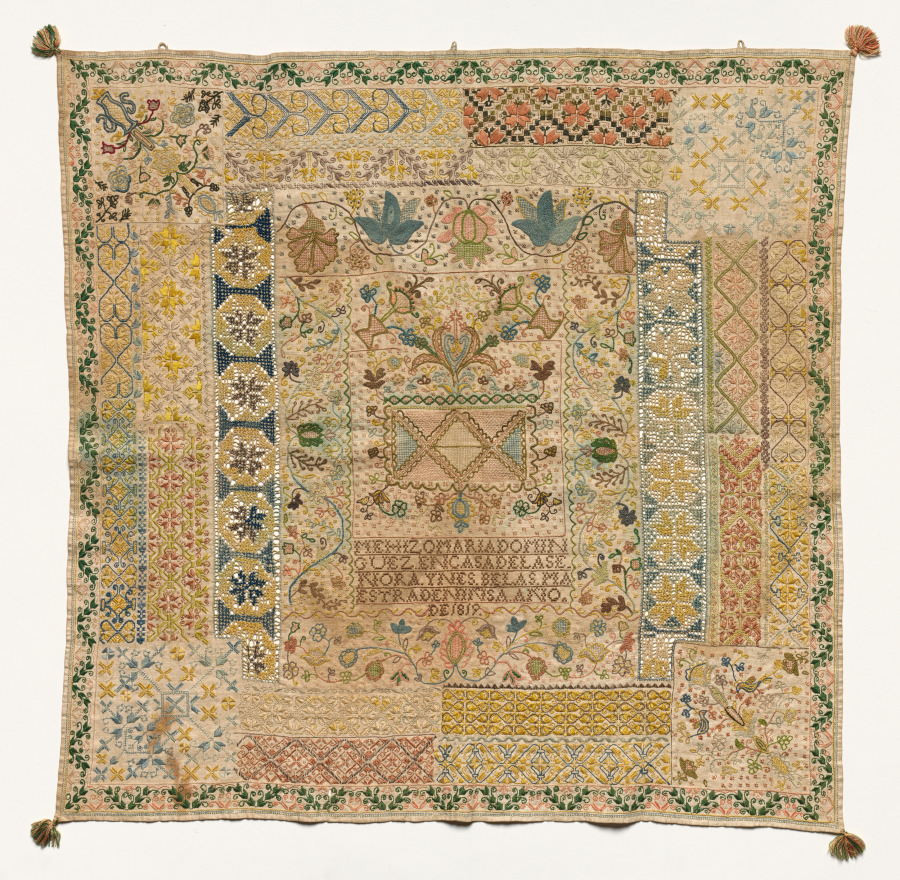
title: Sampler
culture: Spain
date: 1819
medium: embroidery; silk on linen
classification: Sampler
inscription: in center, a panel with the inscription: "Me hizo Maria Dominguez en casa de la Senora Ynes Belas Maestra de Ninsa. Ano de 1819."